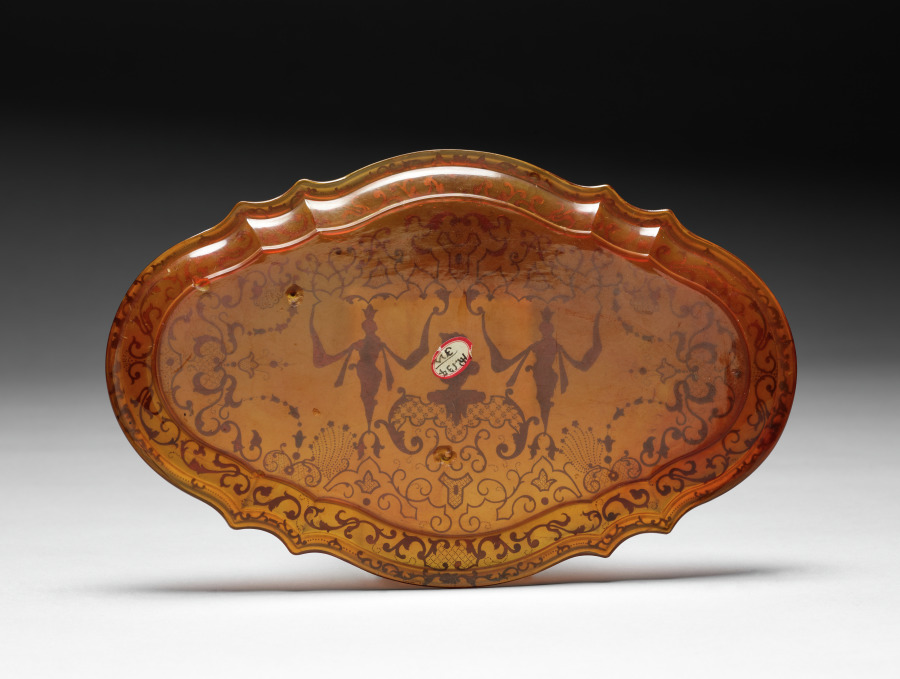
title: Tray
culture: France, 18th century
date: c. 1750 (?)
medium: amber decorated with inlaid gold and mother-of-pearl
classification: Miscellaneous